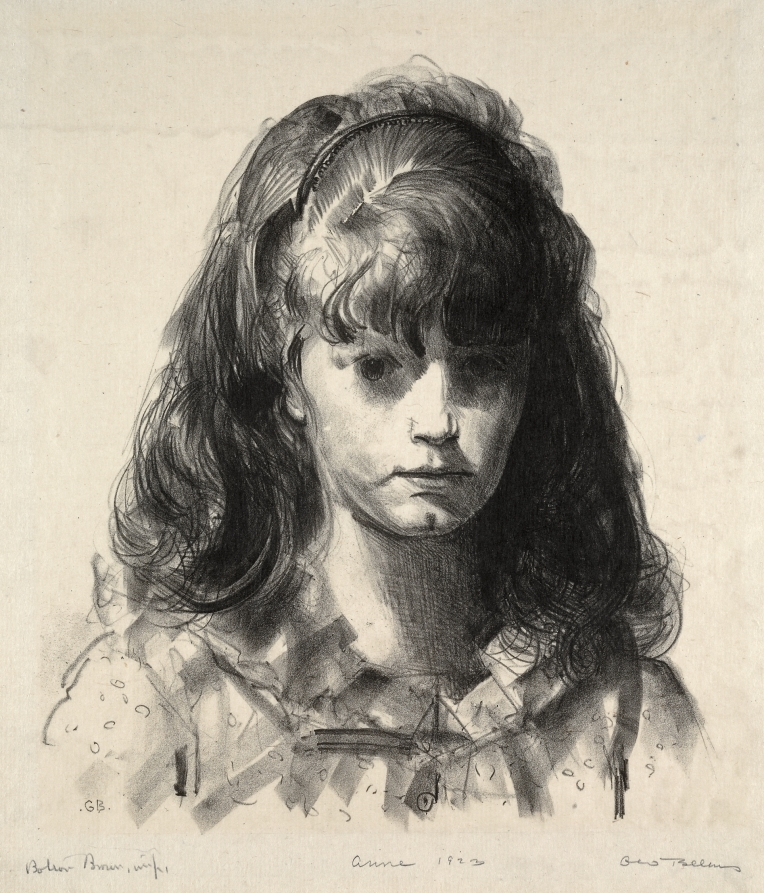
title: Head of Anne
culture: America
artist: George Bellows (American, 1882–1925)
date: 1923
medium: lithograph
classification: Print